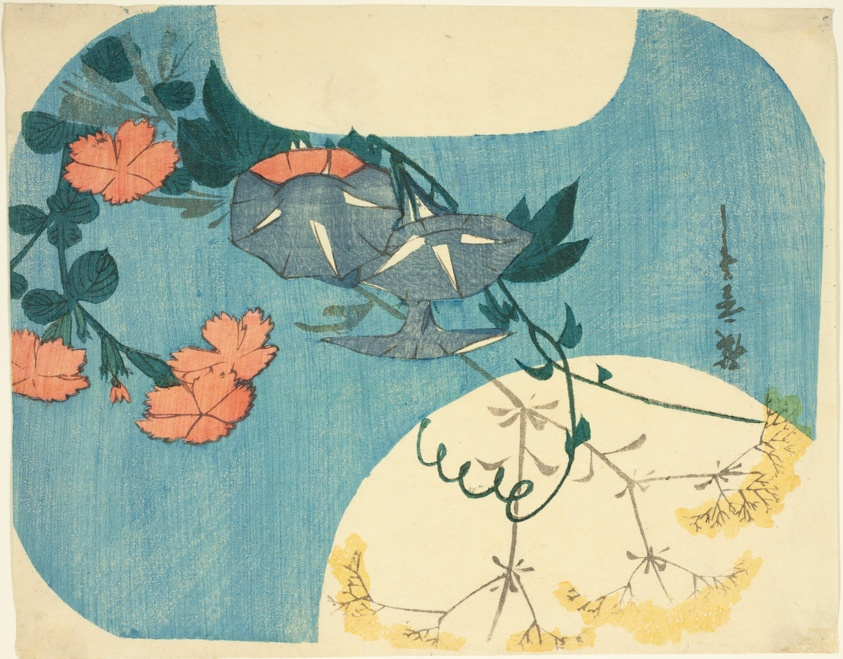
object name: Print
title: Morning Glories, Pinks, and Maiden Flower, from the series "Seven Autumn Flowers in Moonlight"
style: Japanese (culture or style)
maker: Utagawa Hiroshige 歌川 広重; Japanese, 1797-1858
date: 1830/44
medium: Color woodblock print; uchiwa-e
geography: Japan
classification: woodblock print; print; asian art